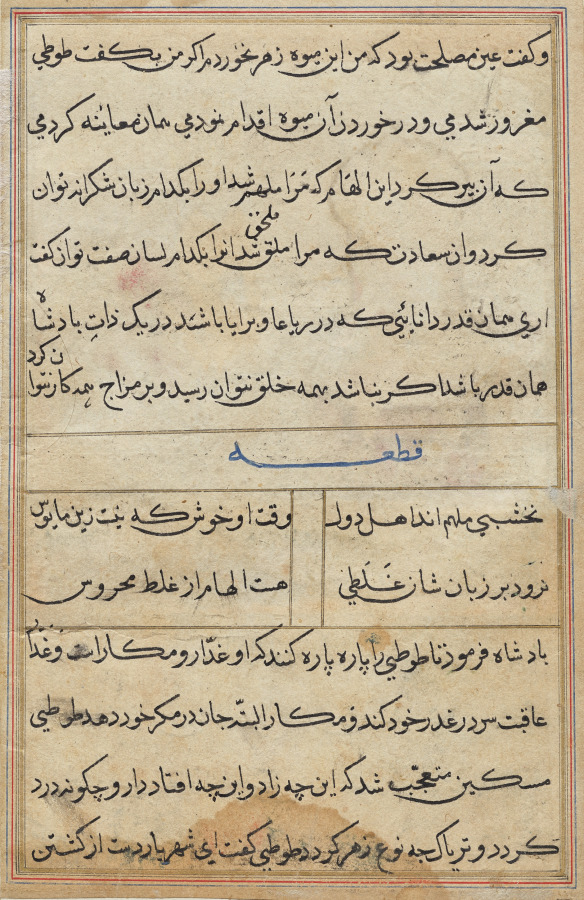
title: Page from Tales of a Parrot (Tuti-nama): text page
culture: Mughal India, court of Akbar (reigned 1556–1605)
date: c. 1560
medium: gum tempera, ink, and gold on paper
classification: Painting